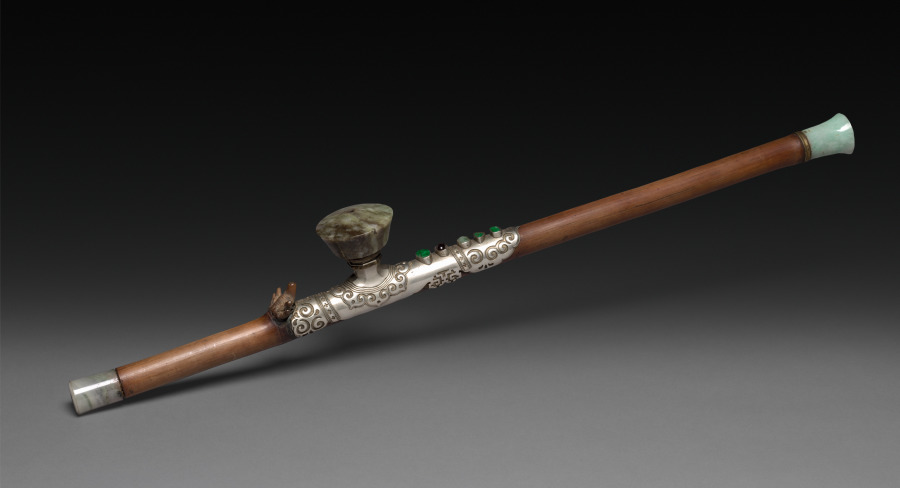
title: Opium Pipe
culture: China, Qing dynasty (1644-1911)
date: 1800s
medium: wood, jade and silver decoration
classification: Miscellaneous